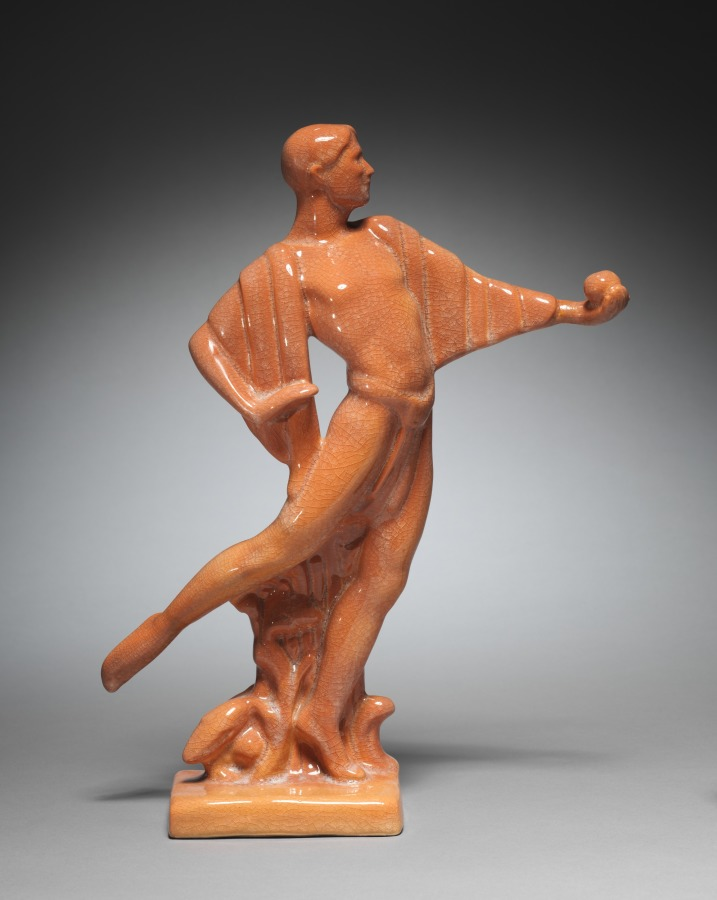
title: Adam and Eve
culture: America, Ohio, Cleveland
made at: Cowan Pottery Studio (America, Rocky River, Ohio, 1920–1931)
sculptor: R. Guy Cowan (American, 1884–1957)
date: 1928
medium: glazed ceramic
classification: Ceramic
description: In a remarkable departure from tradition, this ceramic sculpture depicts Adam tempting Eve with the forbidden fruit from the Tree of Knowledge. According to the Bible, it was Eve who offered Adam the apple which led to mankind's downfall, ushering sin and death into the world. Adam's loincloth indicates that he has become ashamed of his nudity, a sign of his fall from grace. This startling role reversal reflects Cowan's belief that men are more prone to moral temptation than women. In addition to its innovative iconography, the sculpture's rich color and elegant, rhythmic forms establish it as Cowan's finest work and a masterpiece of the American Art Deco aesthetic. Born to a family of potters in East Liverpool, Ohio, Cowan directed the Cowan Pottery studios in Lakewood (1912-17) and Rocky River (1919-32), Ohio. Cowan Pottery was among the foremost producers of American Art Deco pottery and ceramic sculpture. Cowan recruited many talented artists to work in his studios, including Thelma Frazier Winter, Edward Winter, Walter Sinz, Waylande Gregory, and Viktor Schreckengost.